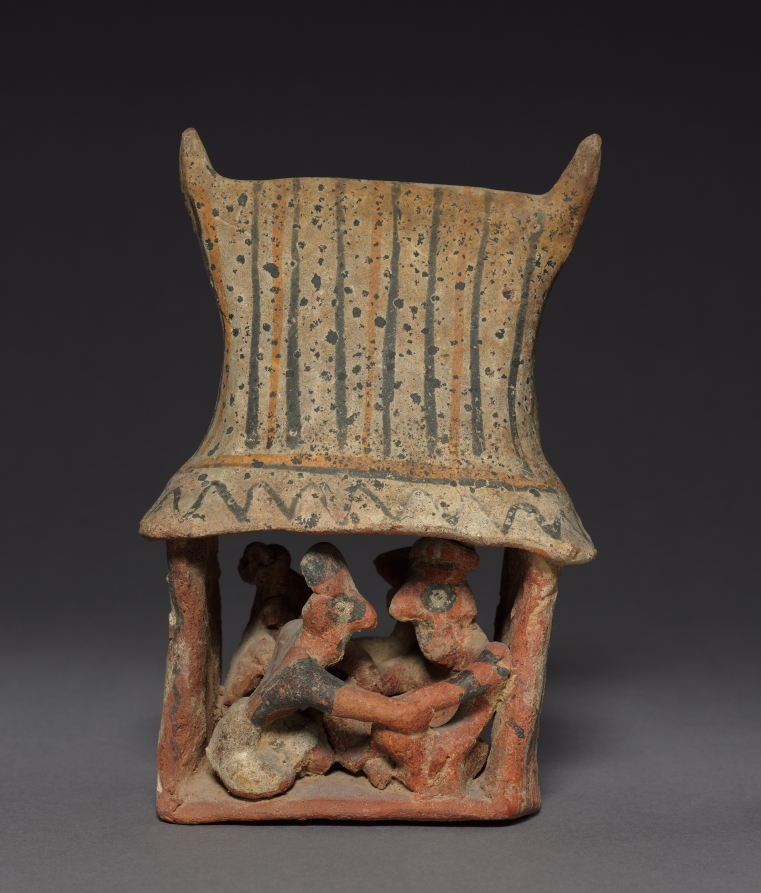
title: Architectural Scene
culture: Mesoamerica, West Mexico, Nayarit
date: 200 BCE–300 CE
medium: ceramic, pigment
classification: Sculpture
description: This scene, which shows several people inside a structure, is a compact version of larger, more elaborate examples. Like them, it could depict festivities held to commemorate one of life’s milestones, such as marriage or the coming of age.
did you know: This scene may depict festivities held to commemorate one of life’s milestones, such as marriage.